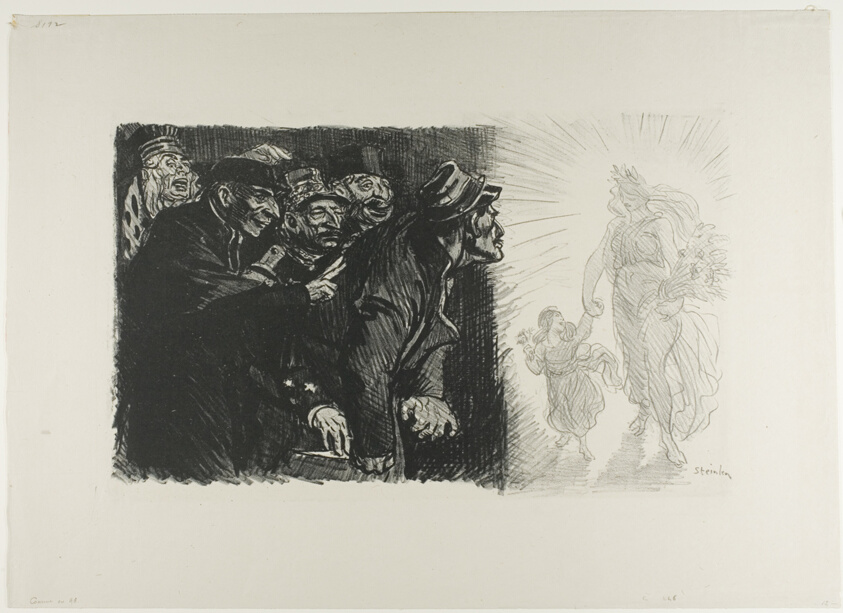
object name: Print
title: As in Ninety-Three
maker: Théophile-Alexandre Steinlen; French, born Switzerland, 1859-1923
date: July 1901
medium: Lithograph in black on gray wove chine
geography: France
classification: lithograph; print; prints and drawing